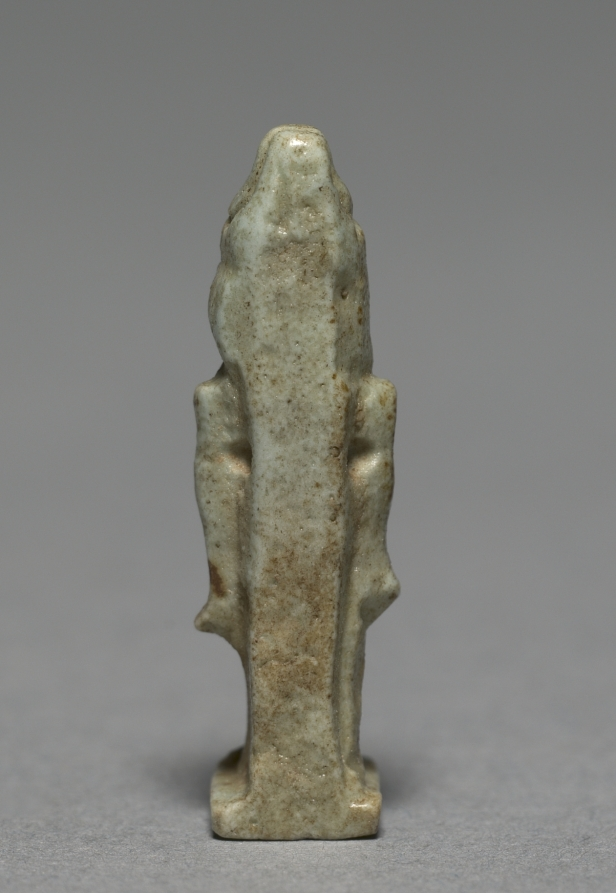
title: Amulet of Horus (?)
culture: Egypt, Late period (715–332 BCE), Dynasty 30–Greco-Roman period (332 BCE–395 CE), Ptolemaic dynasty (305–30 BCE)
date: 380–30 BCE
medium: gray green faience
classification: Amulets